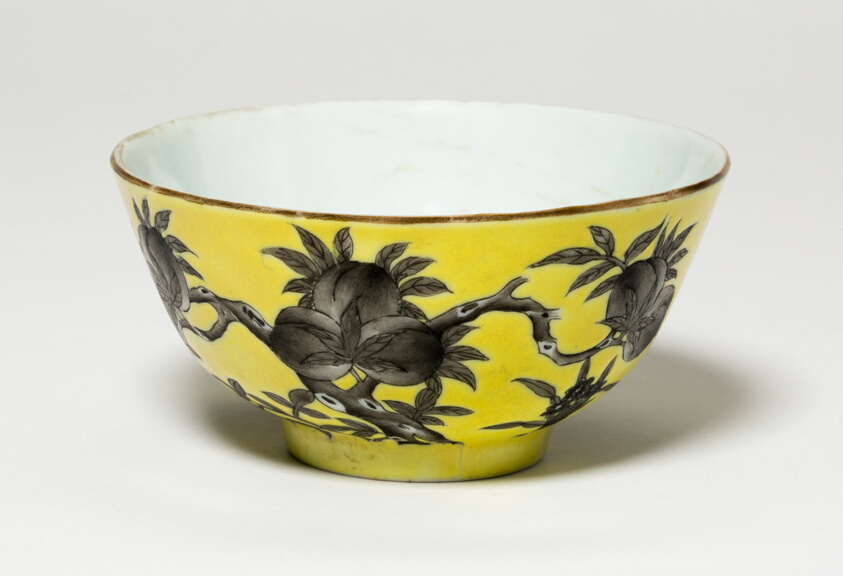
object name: Vessel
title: Cup with Peaches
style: Chinese (culture or style), qing, East Asian, asian, guangxu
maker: China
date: Qing dynasty (1644–1911), Guangxu period (1875–1908), c. 1894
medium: Porcelain painted in overglaze enamels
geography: China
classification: drinking vessel; porcelain; vessel